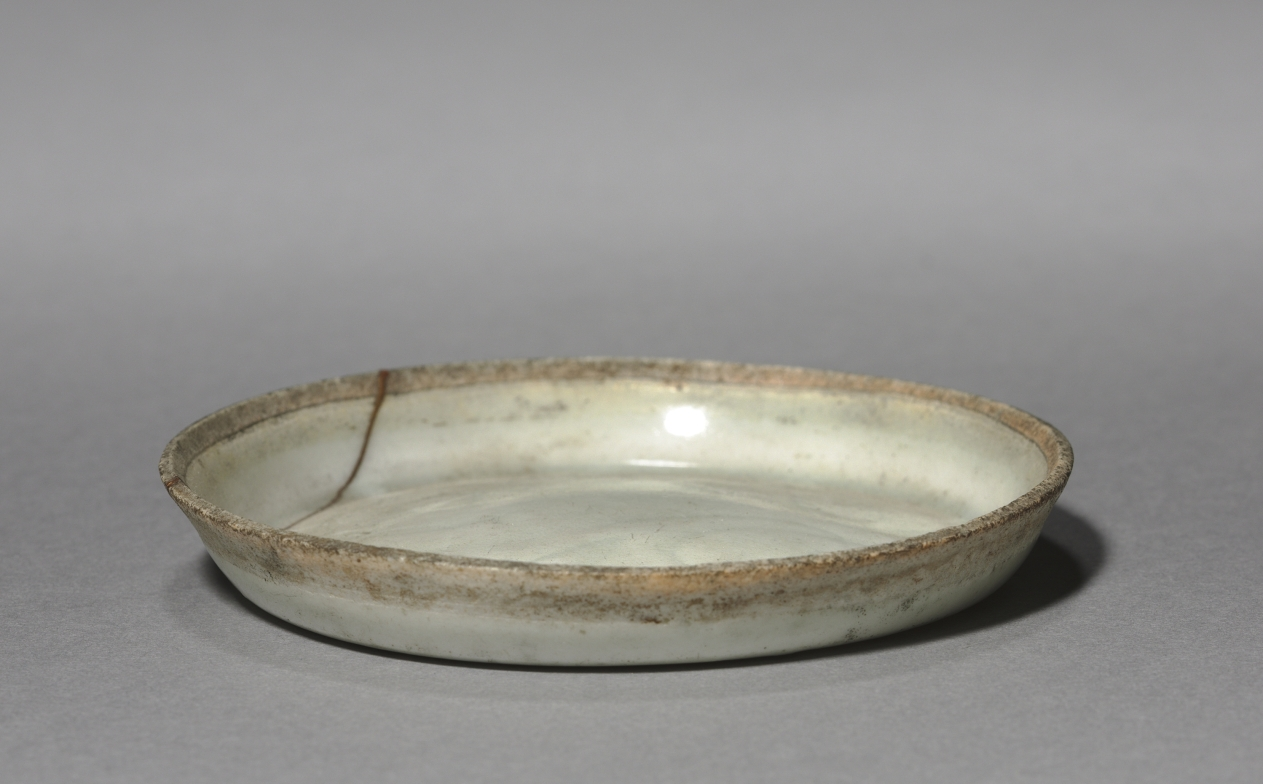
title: Dish with Incised Scroll Design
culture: China, Song dynasty (960-1279)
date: 900s–1100s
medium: Pottery with pale bluish-white glaze and incised design, Qingbai ("blue-white") ware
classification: Ceramic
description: While this dish was donated as a rare white celadon excavated from a Goryeo period tomb, it turns out to be a Song period Chinese Qingbai ware much enjoyed as a luxury item among Korean ruling elites in the Goryeo period (918–1392).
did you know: This lightly potted shallow dish is carved and combed with what might be flowering peony.